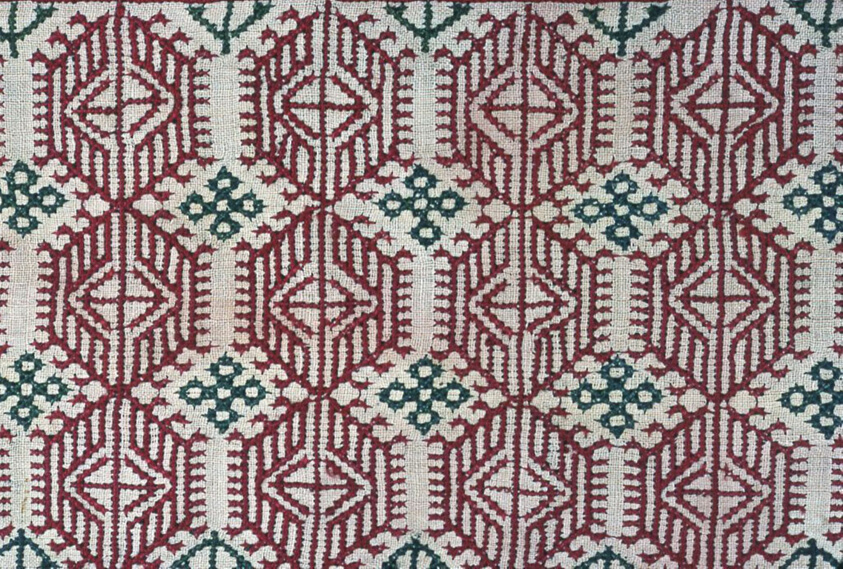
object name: Textile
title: fragment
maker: Morocco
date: 19th century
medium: Embroidered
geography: Morocco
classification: textile; needlework (visual works); weaving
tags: morocco